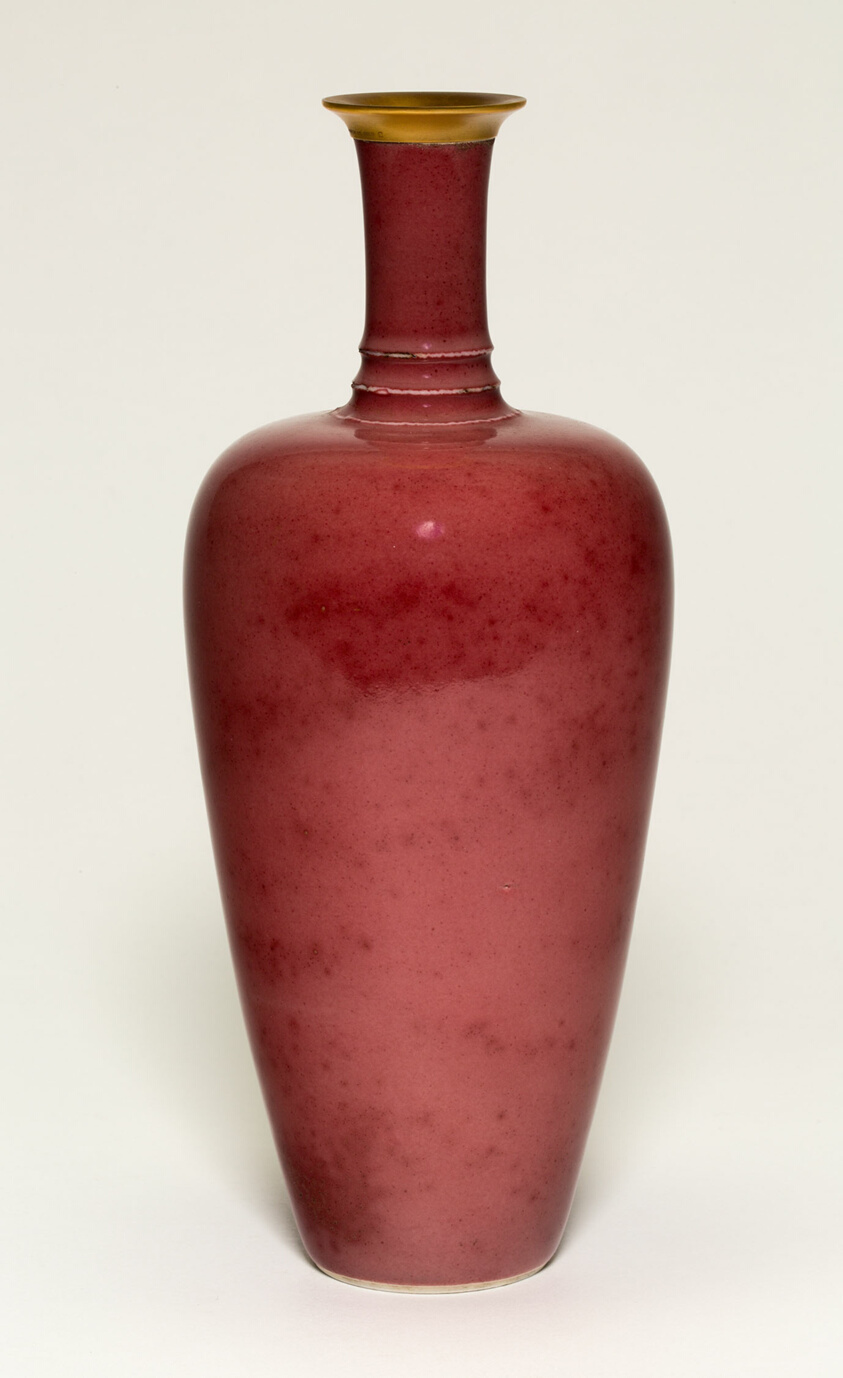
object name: Vessel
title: Ovoid-Shaped Vase with Gilted Lip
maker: China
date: Qing dynasty (1644–1911), Kangxi reign mark and period (1662–1722)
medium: Porcelain with copper red peachbloom glaze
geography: China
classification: porcelain; asian art; ceramics